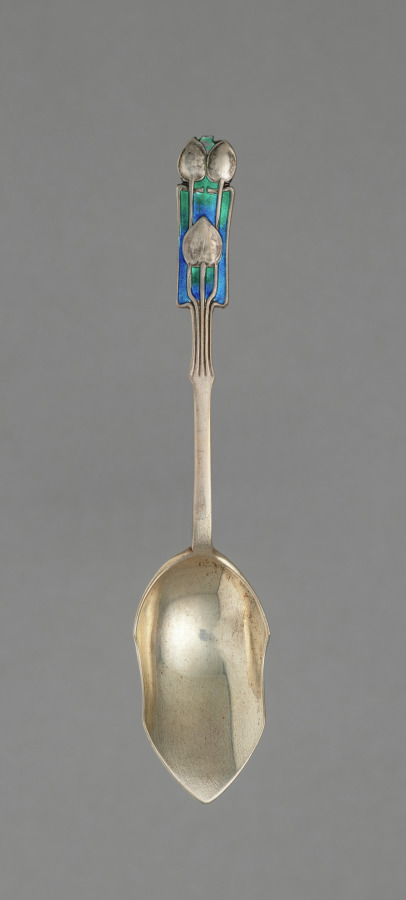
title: Set of six Spoons in Original Box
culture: England, London, 19th century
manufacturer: Liberty and Company (British)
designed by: attributed to Archibald Knox (British, 1864–1933)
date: c. 1895–1910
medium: Silver, enamel decoration and leather box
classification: Silver